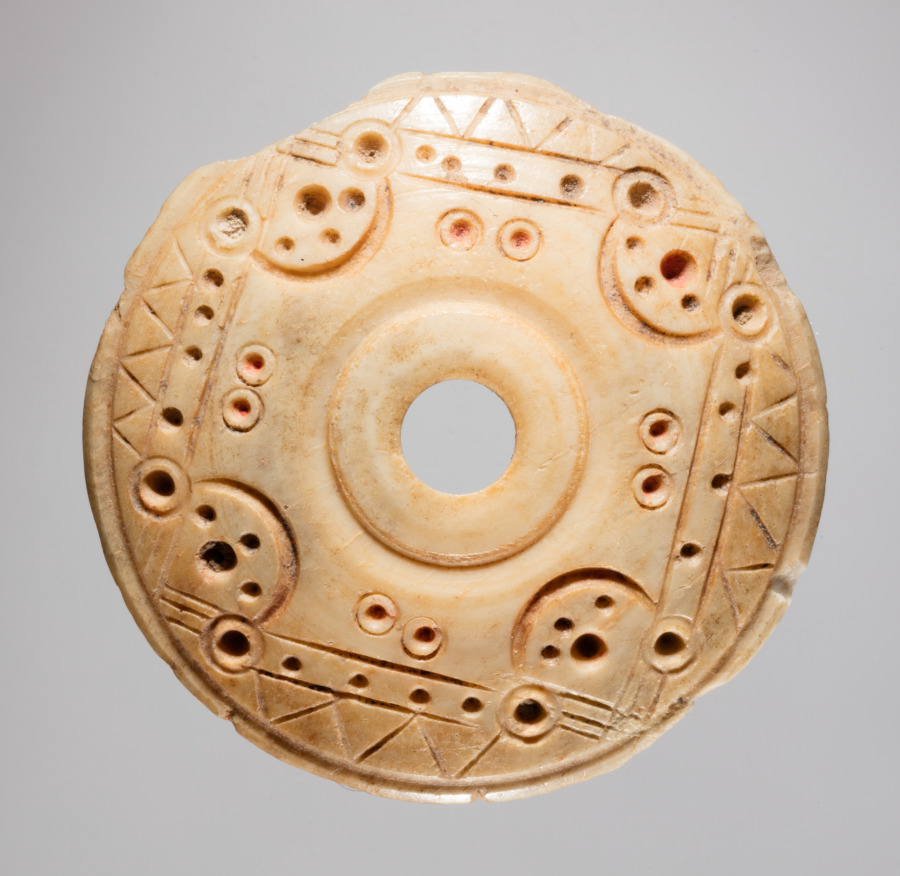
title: Spindle Whorl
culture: Iran, early Islamic period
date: 700s - 900s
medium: bone, incised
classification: Spindle Whorl